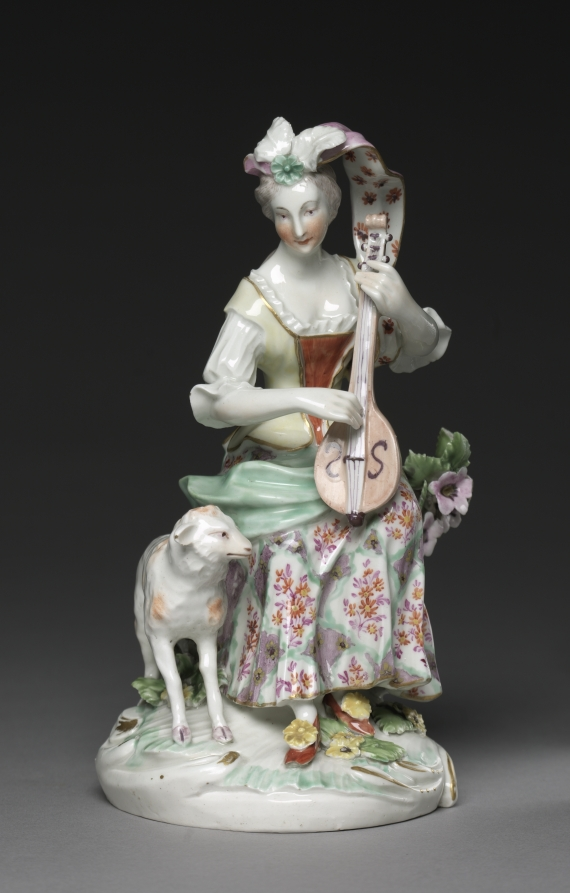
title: Seated Musician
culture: England, Derby, 18th century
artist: Derby Porcelain Factory (British)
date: c. 1765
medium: soft-paste porcelain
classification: Ceramic